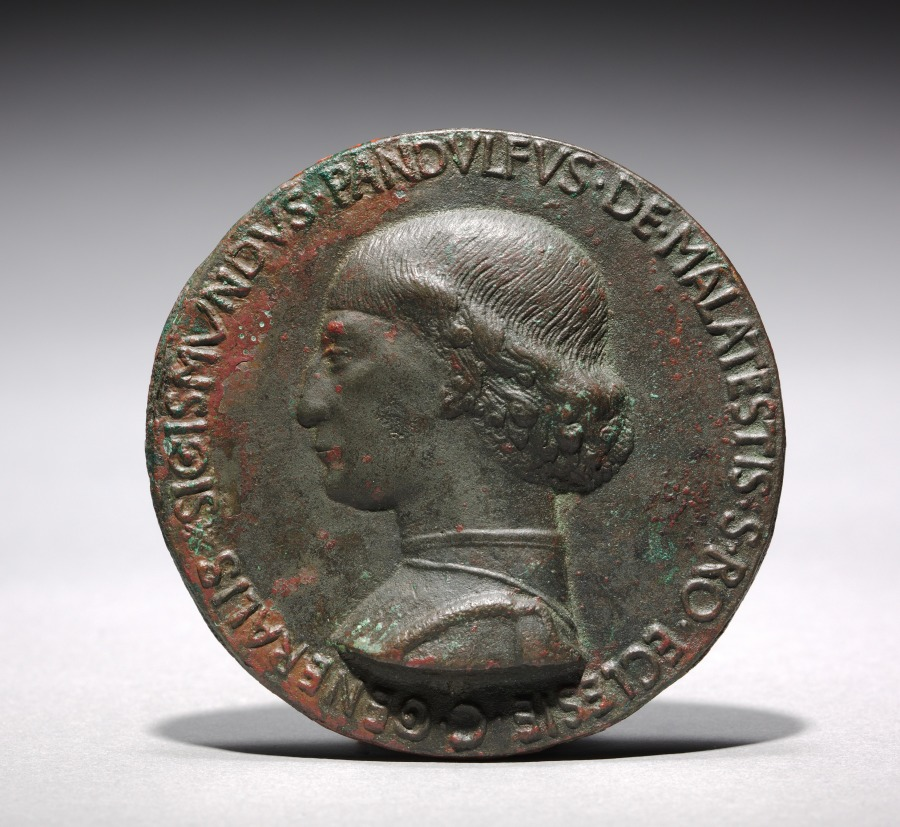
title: Portrait of Sigismondo Pandolfo Malatesta, Lord of Rimini and Fano (obverse) Portrait of Sigismondo Pandolfo Malatesta, Lord of Rimini and Fano (reverse)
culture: Italy, 15th century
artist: Matteo de' Pasti (Italian, 1420–1467/68)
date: 1446 or later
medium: bronze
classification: Sculpture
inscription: located along the circumference: SIGISMVNDVS PANDVFVS DE MALATESTIS S(anctae) RO(manae) ECLESIE C(apitaneus) GENERALIS.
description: Malatesta was both a ruthless military leader and a man of considerable learning and culture. His medals, largely used for propoganda purposes, are among the earliest examples of the medium and speak to the innovations in the classical tradition that he fostered in Rimini. The original model dates to 1446, but this cast probably dates to the late 19th or early 20th century.